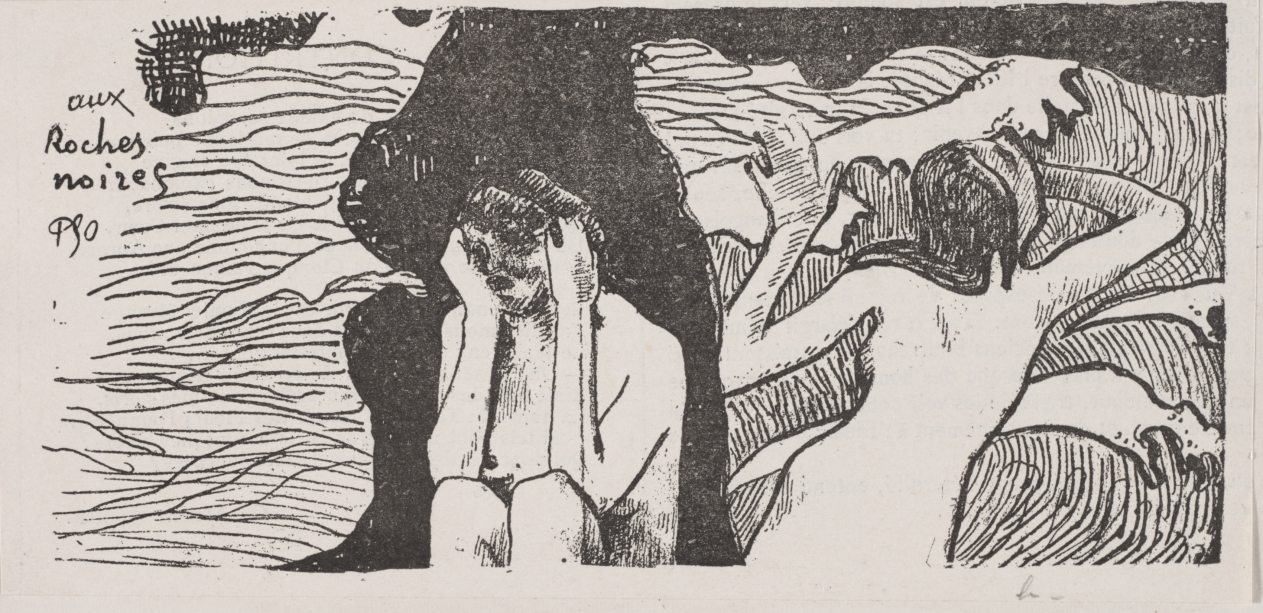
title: The Black Rocks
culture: France, 19th century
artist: Paul Gauguin (French, 1848–1903)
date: c. 1898–99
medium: lithograph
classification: Print